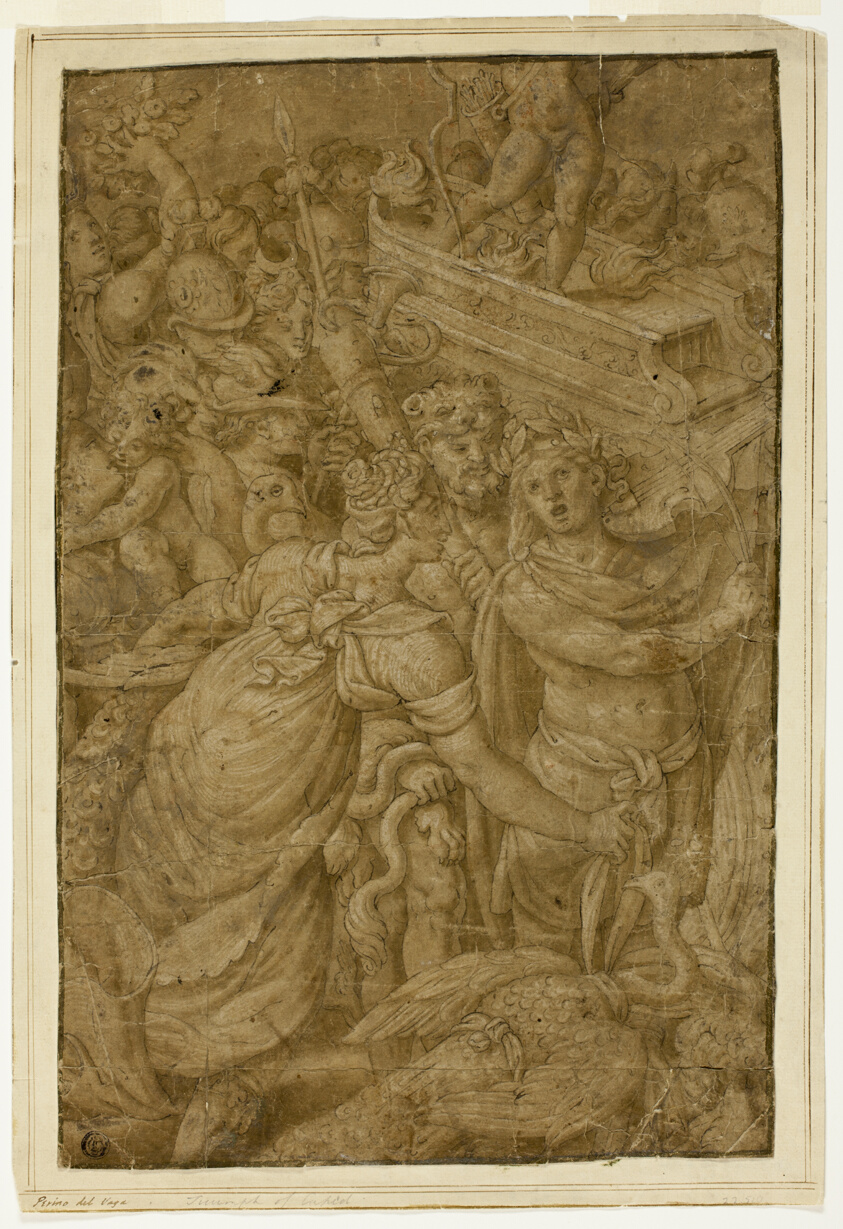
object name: Drawing and Watercolor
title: Cupid in Triumphal Chariot, Accompanied by Gods and Goddesses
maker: Follower of Giulio Pippi, called Giulio Romano; Italian, c. 1499-1546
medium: Pen and brown ink with brush and brown wash, heightened with lead white (partly oxidized), on tan laid paper, tipped onto ivory laid paper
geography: Italy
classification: ink with wash; drawings (visual works); prints and drawing